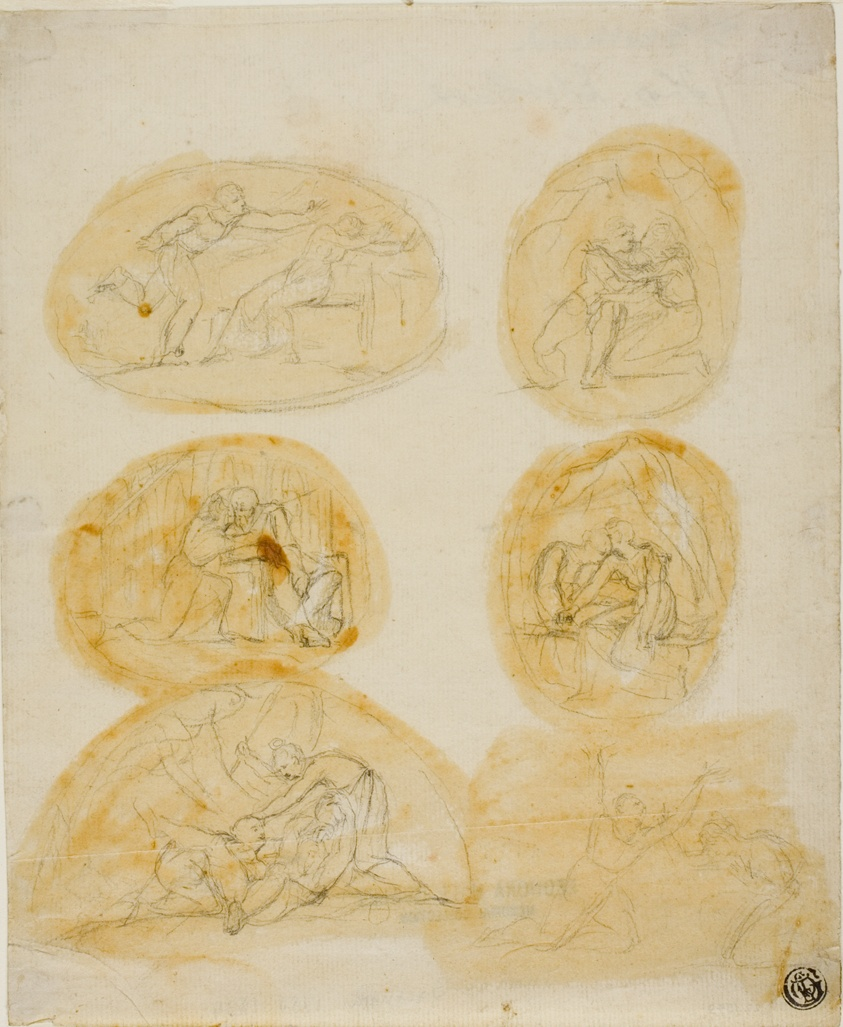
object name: Drawing and Watercolor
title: Six Vignettes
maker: Attributed to Thomas Stothard; English, 1755-1834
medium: Graphite, brushed with shellac, on ivory laid paper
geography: England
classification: graphite; drawings (visual works); prints and drawing